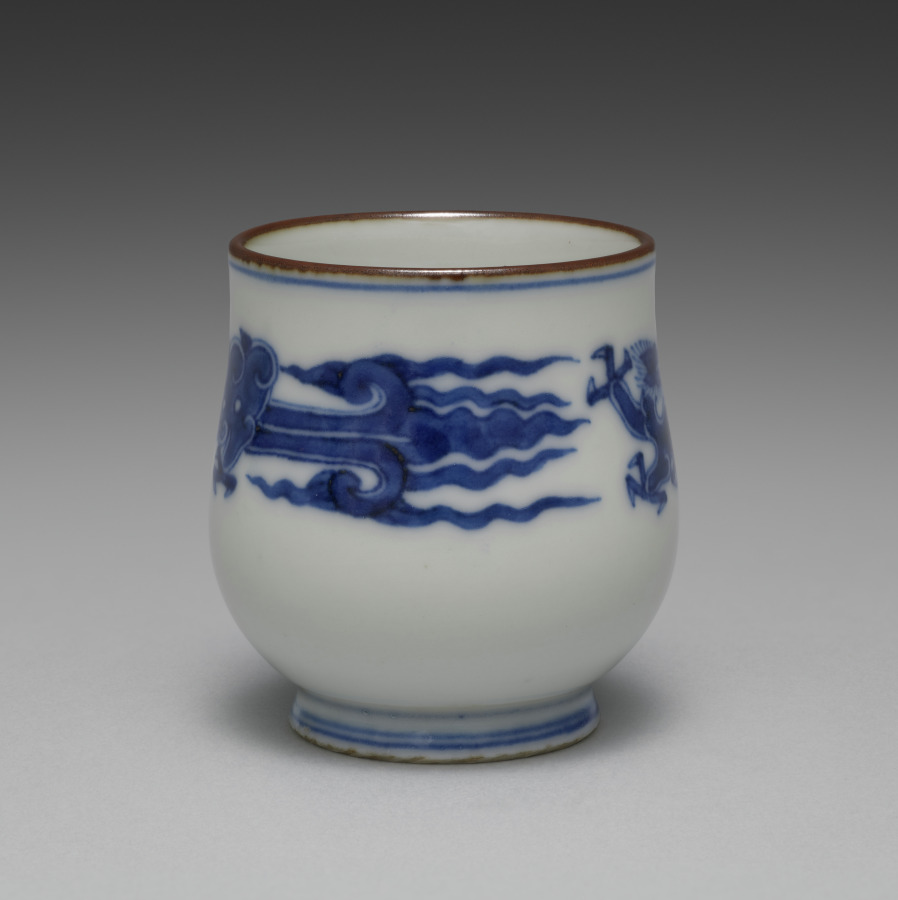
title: Cup from Sake Cups with Dragons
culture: Japan, Meiji period (1868–1912)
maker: Seifū Yohei III (Japanese, 1851–1914)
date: c. 1893–1914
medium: One from a set of six sake cups; porcelain with underglaze blue and iron oxide rims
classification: Ceramic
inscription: 大日本清風造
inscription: 清風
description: Each of these sake cups pictures two backward-looking dragons. The highly stylized creatures resemble jade carvings.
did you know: Seifū Yohei III was inspired by the Chinese mythical animals that were common on porcelain objects made at Jingdezhen in China during the Ming dynasty (1368–1644) and then exported around the world.